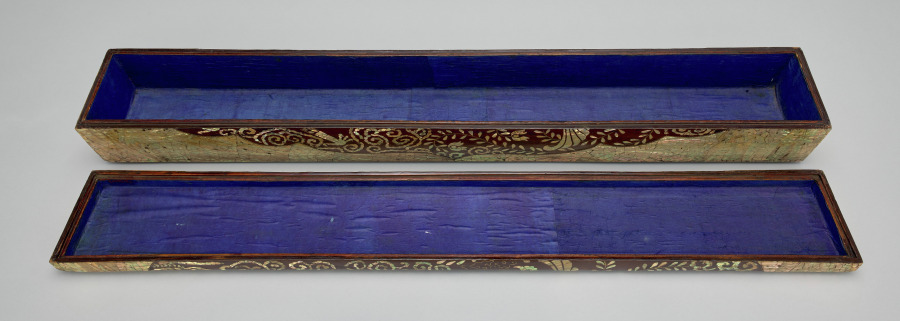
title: Scroll Box with Dragon and Phoenix Design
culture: Korea, Joseon dynasty (1392–1910)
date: 1800s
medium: lacquered wood inlaid with mother-of-pearl and twisted brass and copper wire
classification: Lacquer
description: This large rectangular box was designed for keeping a scroll or an important document. The mother-of-pearl inlaid lacquer rendering of a dragon and phoenix combines texture, color, and shape to produce a dazzling effect. The large and prominent designs of the Joseon-period inlaid lacquer, like on this box, replaced the fine detail and mosaic-like patterns popular in the Goryeo period (918-1392).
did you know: This technique of using the inlays of iridescent mother-of-pearl and abalone shells has been practiced in Korea for over a thousand years,